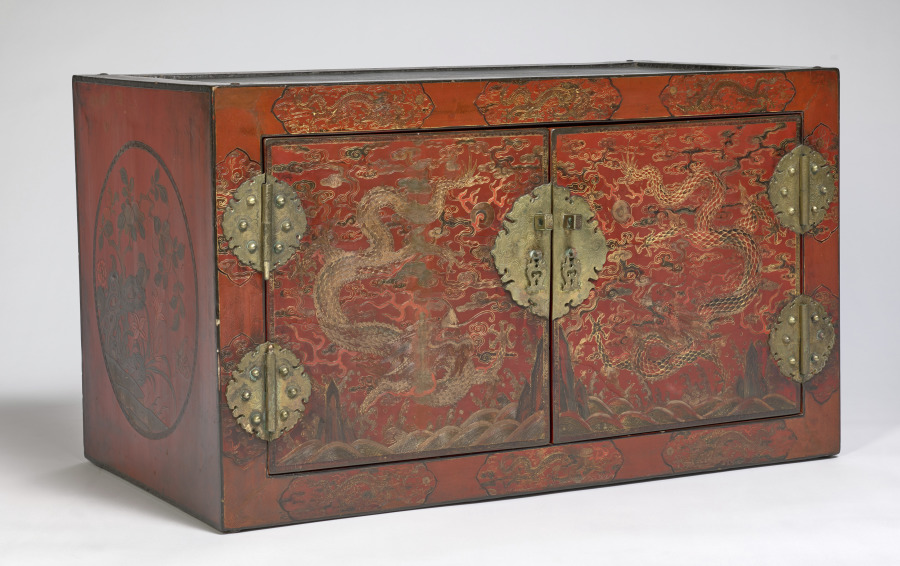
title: Top Chest of a Double Cabinet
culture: China, Ming dynasty (1368-1644) - Qing dynasty (1644-1911)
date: 1600s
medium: red lacquer on wood with pigment and gilding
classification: Furniture and woodwork